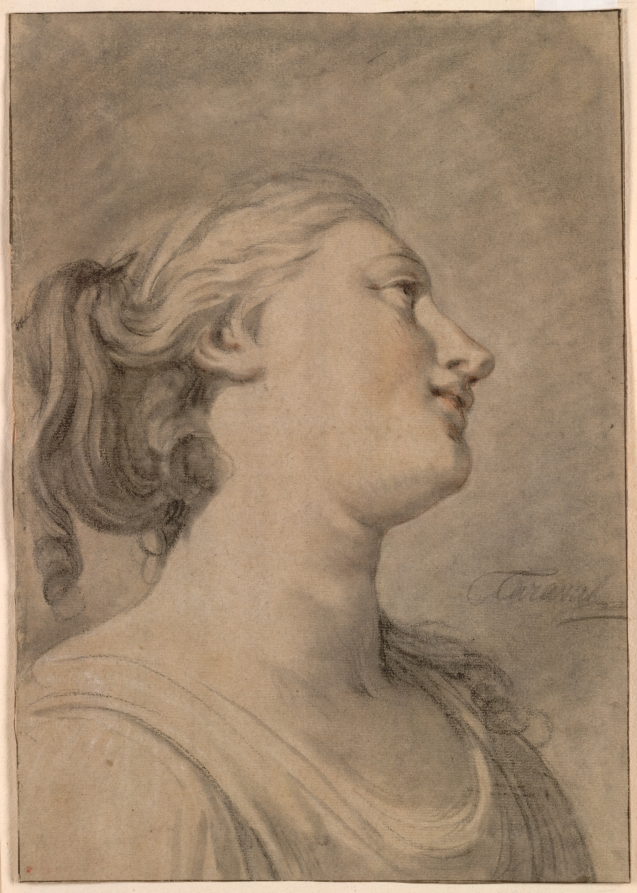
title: Head of a Female Figure in Profile, Turned to the Right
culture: France, 18th century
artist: Hughes Taraval (French, 1729–1785)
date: c. 1763–1770?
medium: charcoal with red and white chalk and stumping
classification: Drawing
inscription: signed, lower right, in charcoal or black chalk: Taraval; verso of secondary support, center, in brown ink: No 2; center, in graphite: 144 [circled]; lower right, in graphite: R + S / 5985; lower right, in graphite: 1240 [underlined] / hu77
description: Like the sheet shown nearby by Greuze, this drawing belongs to a type of work known as an expressive head (tête d'expression). Capturing the representation of a specific emotion on the human face became a standard exercise for artists in France and was especially popular during the second half of the 1700s. In 1758, a special prize for drawing the expressive head was established at the Royal Academy of Painting and Sculpture. Although we have no documentation regarding the specific emotion Taraval wanted to capture here, the work may represent admiration or adoration.